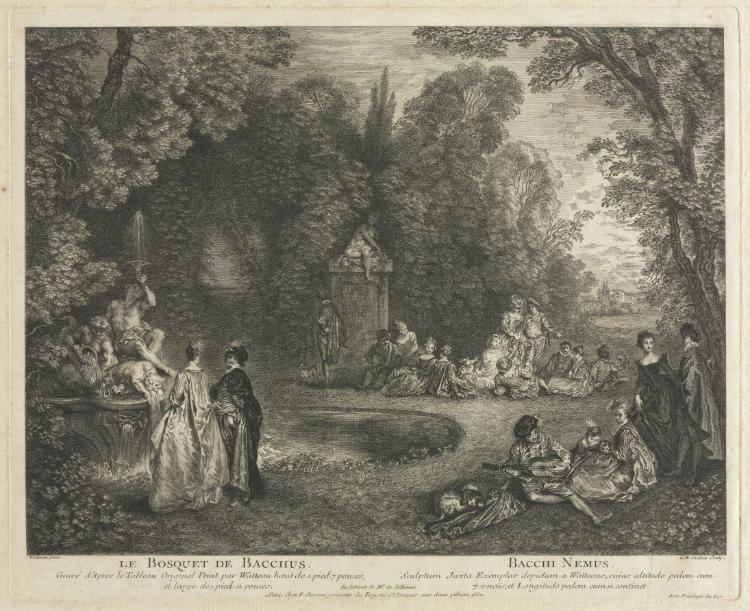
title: Le Bosquet de Bacchus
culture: France, 18th century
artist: Charles-Nicolas Cochin (French, 1715–1790)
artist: after Jean-Antoine Watteau (French, 1684–1721)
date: 1727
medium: etching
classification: Print